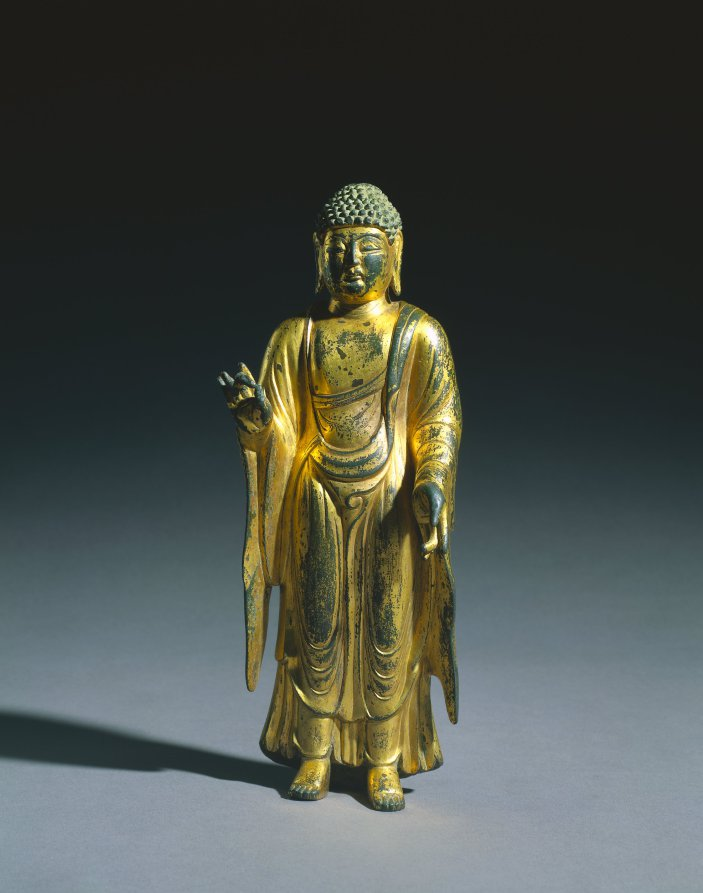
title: Standing Amitabha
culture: Korea, Unified Silla period (676-935)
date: 800s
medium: gilt bronze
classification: Sculpture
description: Buddhist teachings emphasize the pursuit of spirituality, rather than physicality, to achieve enlightenment. This statue’s artist, however, made genuine efforts to represent the divine’s beautiful voluminous body. Inspired by Indian Gupta period art (300s–500s CE), this particular artistic style emphasizing soft modeling and naturalism was further developed in China and flourished across East Asia.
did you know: This Korean statue has a stylistic affinity with statues from the Indian Gupta period (300s–500s CE) that emphasize soft modeling and naturalism.